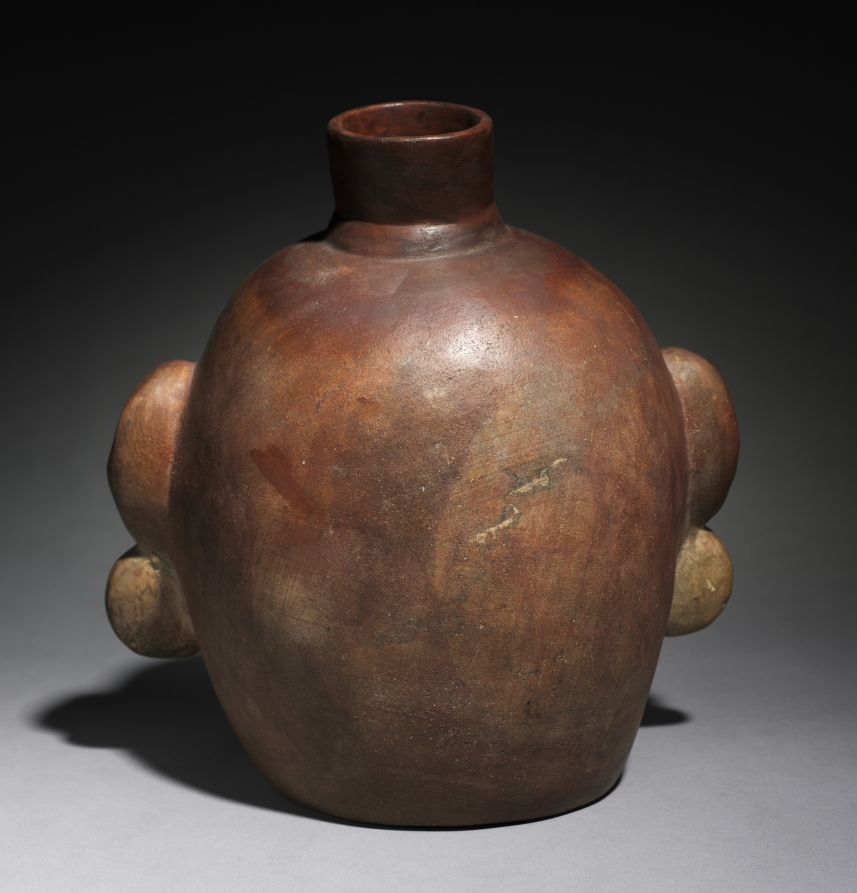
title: Portrait Head Vessel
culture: Peru, North Coast, Moche style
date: 200–550 CE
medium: earthenware with colored slips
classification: Ceramic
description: The Moche were unique in ancient Peru in creating realistic human portraits, usually in the form of ceramic vessels. This large example may represent an important captive who, like some Moche prisoner figures, wears double earrings and a hank of hair over the forehead.